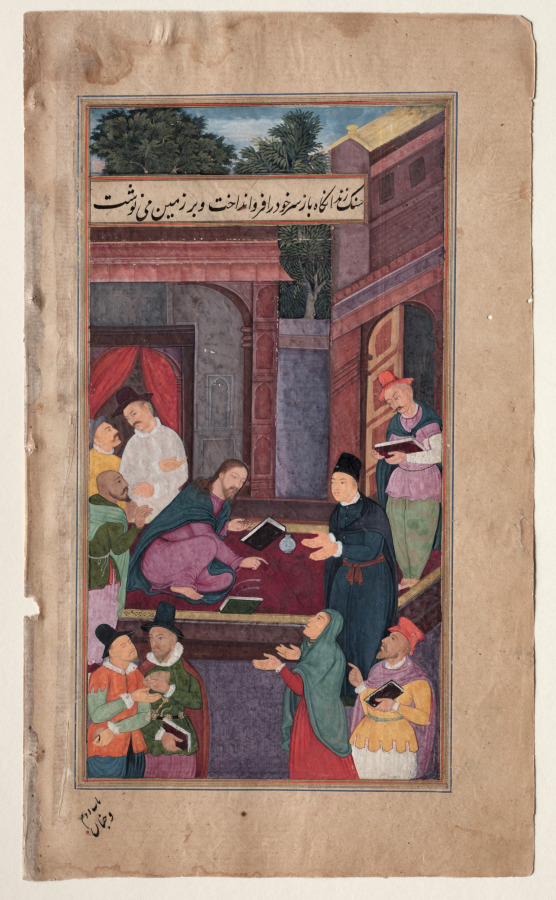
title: Jesus writes on the ground (folio 130 verso), from a Mirror of Holiness (Mir’at al-quds) of Father Jerome Xavier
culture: Mughal India, Allahabad, made for Prince Salim (1569–1627)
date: 1602–4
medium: Gum tempera, ink, color, and gold on paper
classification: Manuscript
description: As Jesus was debating with the scribes and Pharisees in Jerusalem, they brought before him an adulterous woman. Hoping to incite him to violence, they declared that if Jesus followed the law of Moses, he should order her to be stoned to death. Jesus responded, “Let whichever of you is without sin cast the first stone.” Then he began to write with his finger on the ground, and each of the men saw a description of his own sins. The two men in the bottom corner of the painting clutch stones with expressions of doubt, fear, and disgust. The adulteress in the red dress holds out her hands in supplication.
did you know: The adulteress wears a red dress, gold rings, and a necklace under her stole.